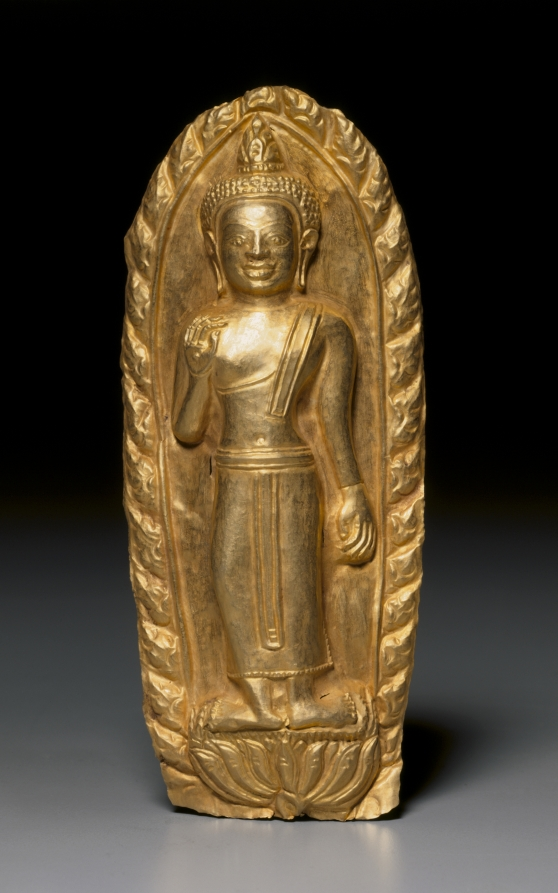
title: Standing Buddha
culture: Southern Myanmar (Burma), Pegu, or northwestern Thailand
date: 1100s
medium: gold repoussé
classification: Metalwork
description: Along with manuscripts, small-scale images of the Buddha could be commissioned by pilgrims or devotees and offered to a monastery in connection with a vow or the consecration of a sacred monument or object. The Buddha stands on a lotus flower that indicates his transcendence above ordinary beings. He is surrounded by flames that communicate his radiance and the intensity of the heat or power he acquired through meditation and discipline. His hands are in the mudra communicating the transmission of the teachings.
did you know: Pegu, the capital of the Mon empire, is on the south-central coast of Myanmar.